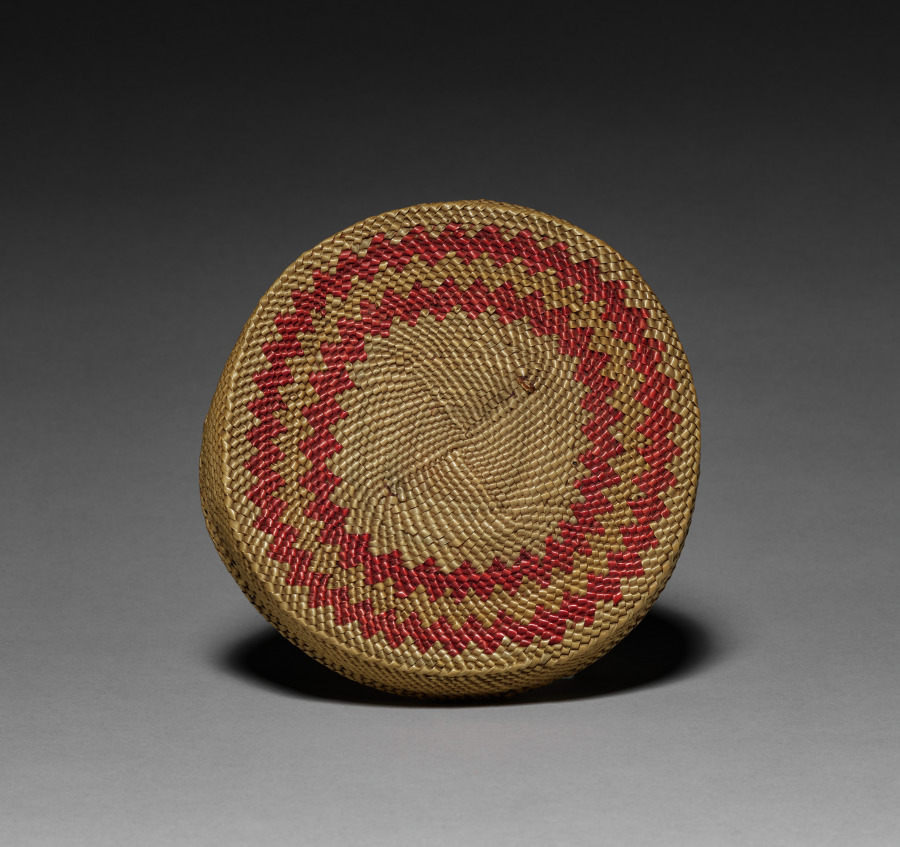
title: Ginger Jar- Shaped Basket (lid)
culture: Northwest Coast, Cape Flattery, Washington, Makah, late 19th-early 20th century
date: c. 1900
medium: pear grass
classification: Basketry